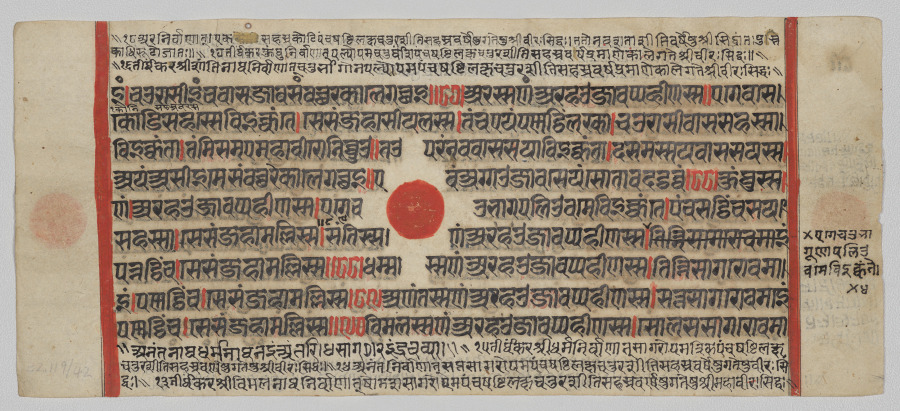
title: Text, Folio 52 (recto), from a Kalpa-sutra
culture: Western India, Gujarat, last quarter of the 15th century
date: c. 1475–1500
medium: Gum tempera, ink, and gold on paper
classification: Painting